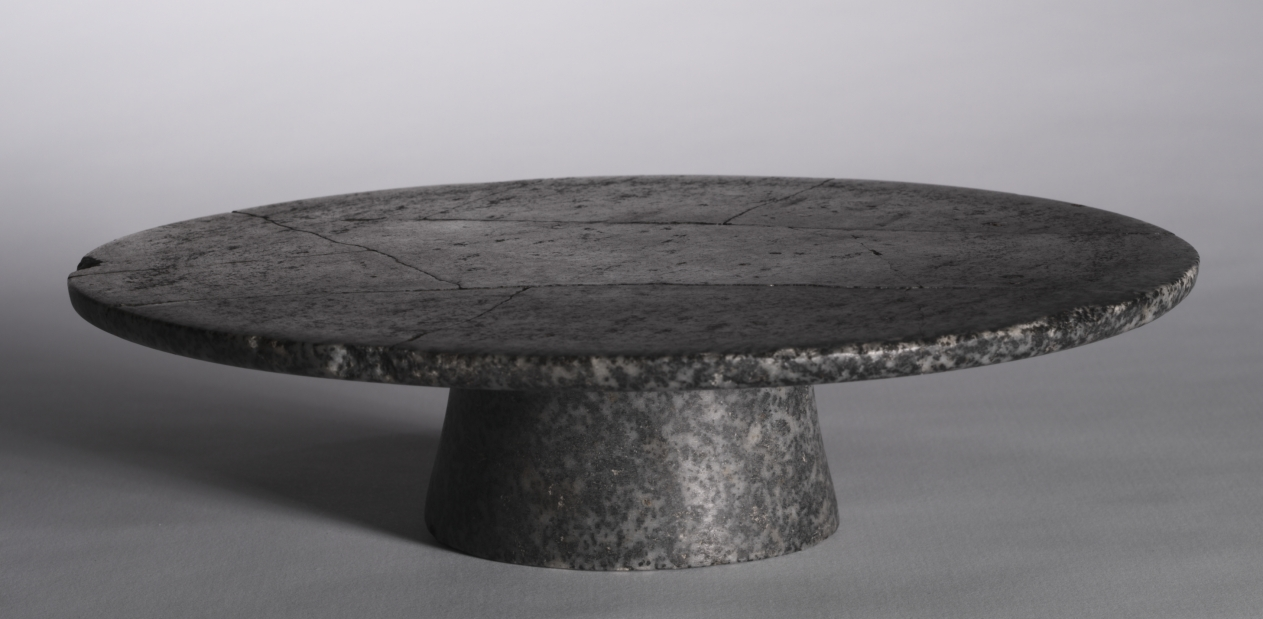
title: Offering Table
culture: Egypt, probably Saqqara, north of the Step Pyramid, excavations of J. E. Quibell, 1910-1911, Early Dynastic (2950–2647 BCE), Dynasties 2–3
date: 2770–2573 BCE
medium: anorthosite gneiss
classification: Vessels